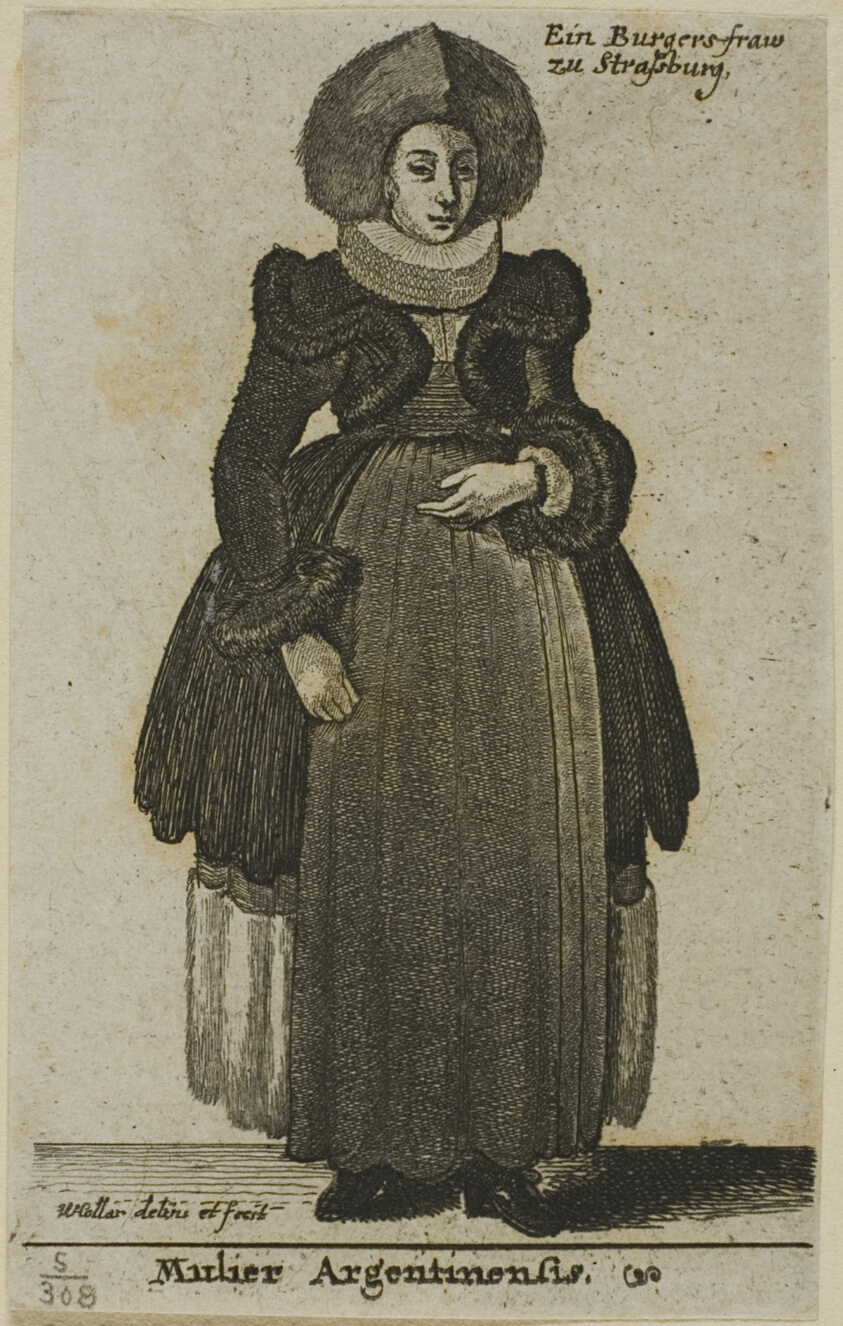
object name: Print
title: Strasbourg Woman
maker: Wenceslaus Hollar (Bohemian, 1607-1677)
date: 1644–50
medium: Etching on gray Asian paper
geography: Bohemia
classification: etching; print; prints and drawing